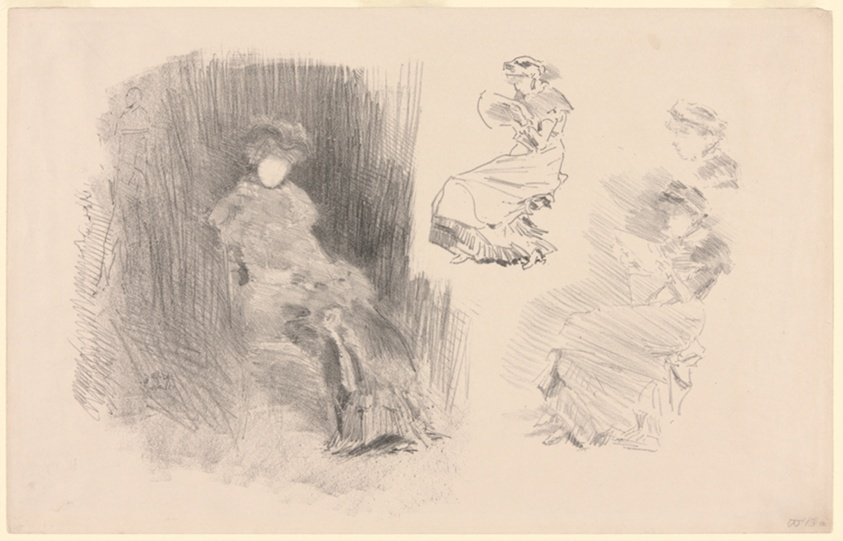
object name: Print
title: Reading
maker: James McNeill Whistler (American, 1834-1903)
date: 1879, published 1887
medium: Lithograph, in black ink, with scraping, on ivory wove paper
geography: United States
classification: lithograph; print; prints and drawing; paper